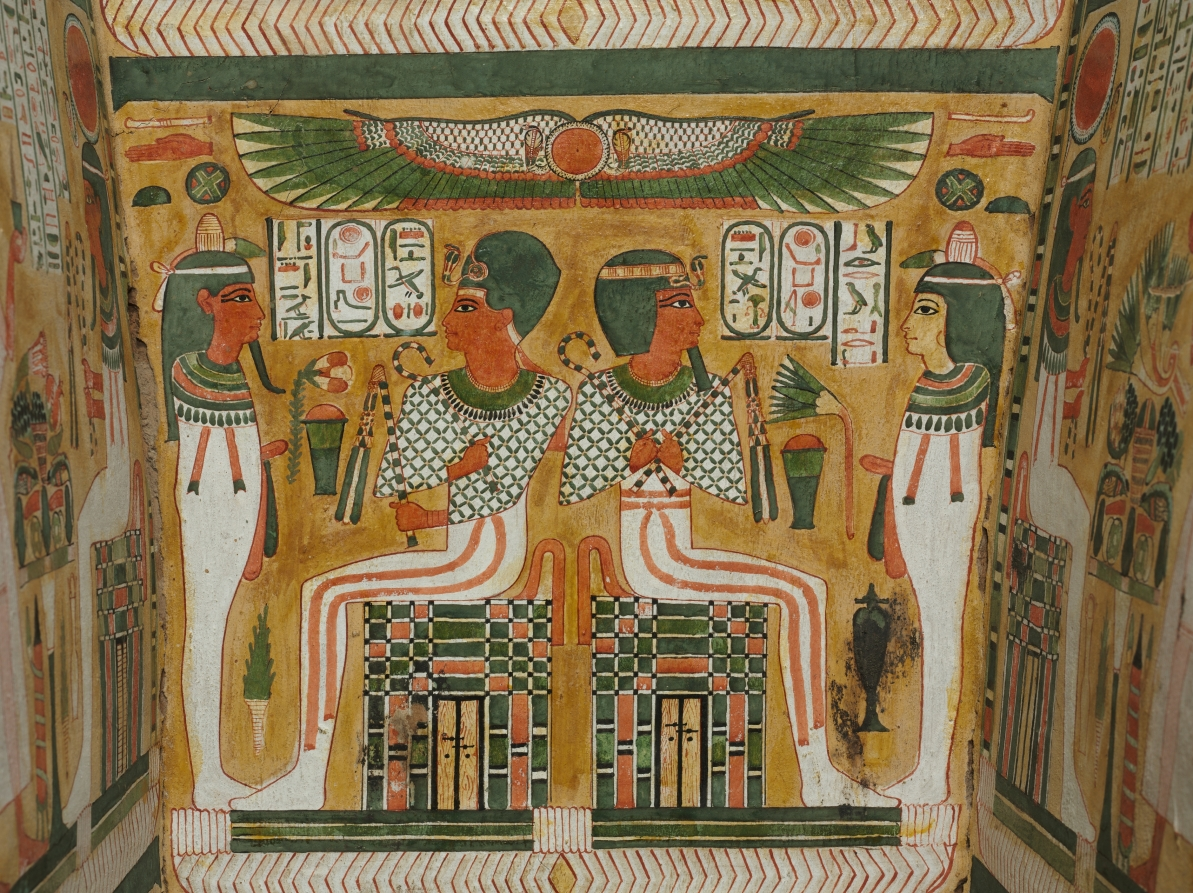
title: Coffin of Bakenmut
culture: Egypt, Thebes, Third Intermediate (1069–715 BCE), Dynasties 21–22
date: c. 1000–900 BCE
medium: gessoed and painted sycamore fig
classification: Funerary Equipment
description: The coffin of Bakenmut is one of the finest examples of painted wooden coffins made for the priests of Amen and their families at Thebes during Dynasty 21 and early Dynasty 22. The pharaohs of this time were no longer buried in the Valley of the Kings, but instead built tombs in the Delta, far to the north, where they resided. Security was lax in the Theban necropolis. The coffins and funerary goods of the wealthy citizens of Thebes were placed in unmarked and undecorated family tombs cut into the cliffs on the west bank of the Nile. All the care and detail that in more prosperous times were devoted to the decoration of the tomb chapel were now lavished on the elaborately painted coffins. Every available surface is crowded with religious scenes, images of funerary gods and goddesses, protective spells, and magical symbols. The deceased appears mummiform. An elaborate floral collar entirely covers the upper body, exposing only the separately attached hands (now lost). A pair of red "mummy braces" are crossed over the chest, their point of intersection marked by a winged sun disk. The lower body is covered with tiny figures modeled in gesso against a yellow background, which gives the effect of gold inlaid with glass or semiprecious stone. The decoration on the interior features two deified dead kings of Dynasty 18. Although these rulers had lived centuries before, memory of their greatness was still very much alive. The main scene near the top depicts Tuthmosis III, the great military pharaoh, who lived 500 years before Bakenmut. Posed as a mummy, the ruler wears a brilliant feathered garment enfolding him with falcon’s wings. The scene below features back-to-back seated images of Amenhotep I, regarded as the patron of the Theban cemetery and worshiped as a local god there.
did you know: Originally another smaller coffin was placed inside this outer coffin and in that the deceased with a mummy board would have rested.